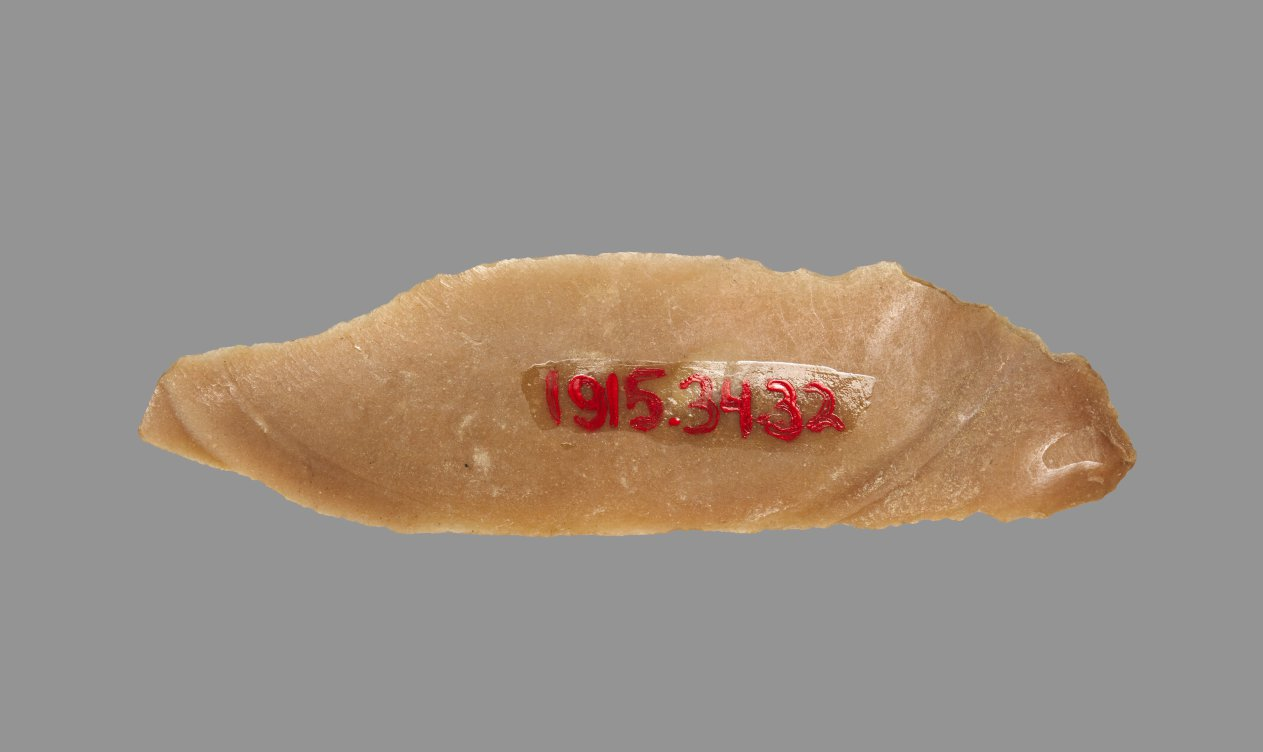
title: Sickle Blade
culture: Egypt, Middle Kingdom (2040–1648 BCE), Dynasty 12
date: 1980–1801 BCE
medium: flint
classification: Implements